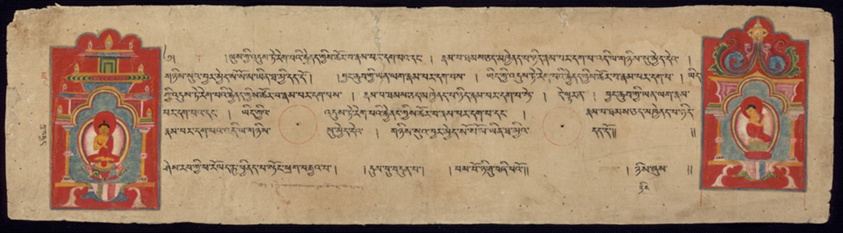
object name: Religious/Ritual Object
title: Page from the Perfection of Wisdom Sutra (Astasahasrika Prajnaparamitasutra)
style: Himalayan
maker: Western Tibet; Guge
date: 11th/12th century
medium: Ink and colors on paper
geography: Western Tibet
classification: manuscript; ritual objects